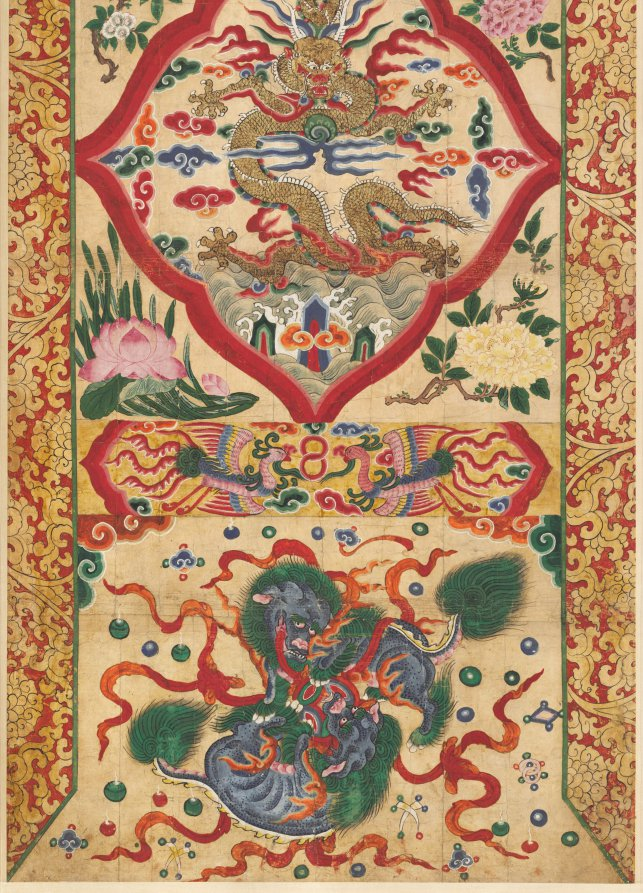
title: Painted Panel of Character "Tiger"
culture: Korea, Joseon dynasty (1392–1910)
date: early 1900s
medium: hanging scroll, ink and color on paper; unmounted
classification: Painting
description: This set of four colorful hanging scrolls may have been used in an outdoor Buddhist ritual to evoke heavenly blessings. Each hanging scroll bears four different character; tiger, dragon, whistle, and recite. Traditionally, tiger and dragon belong to the four directional guards, respectively west and east.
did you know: This set of four colorful hanging scrolls may have been used in an outdoor Buddhist ritual to evoke heavenly blessings.